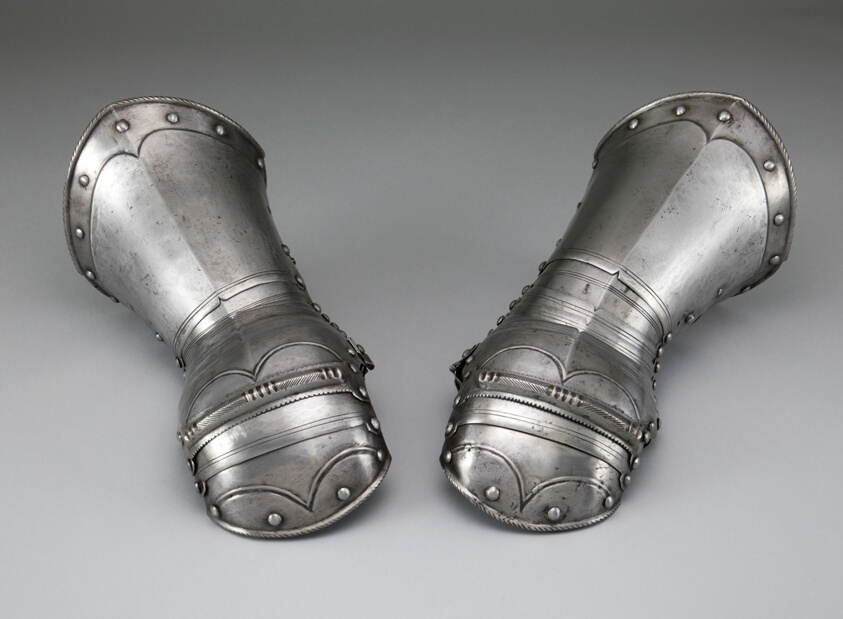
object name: Armor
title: Pair of Mitten Gauntlets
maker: German, probably Brunswick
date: c. 1570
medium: Steel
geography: Brunswick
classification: suit-gauntlet; armor; arms and armor